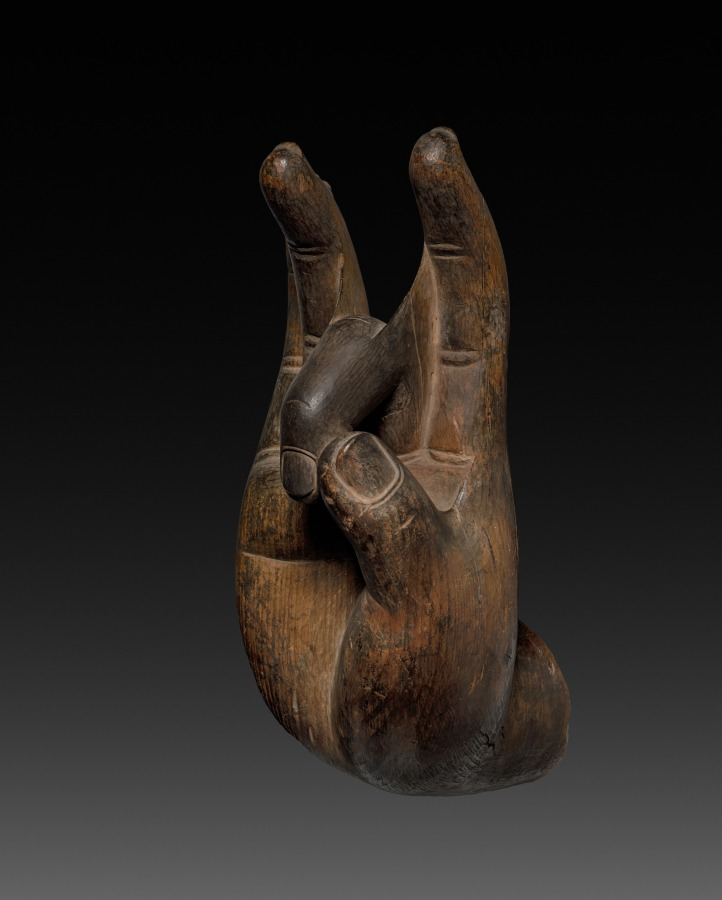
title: Hand of Buddha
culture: Japan, Nara period (710–94)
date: late 700s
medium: wood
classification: Sculpture